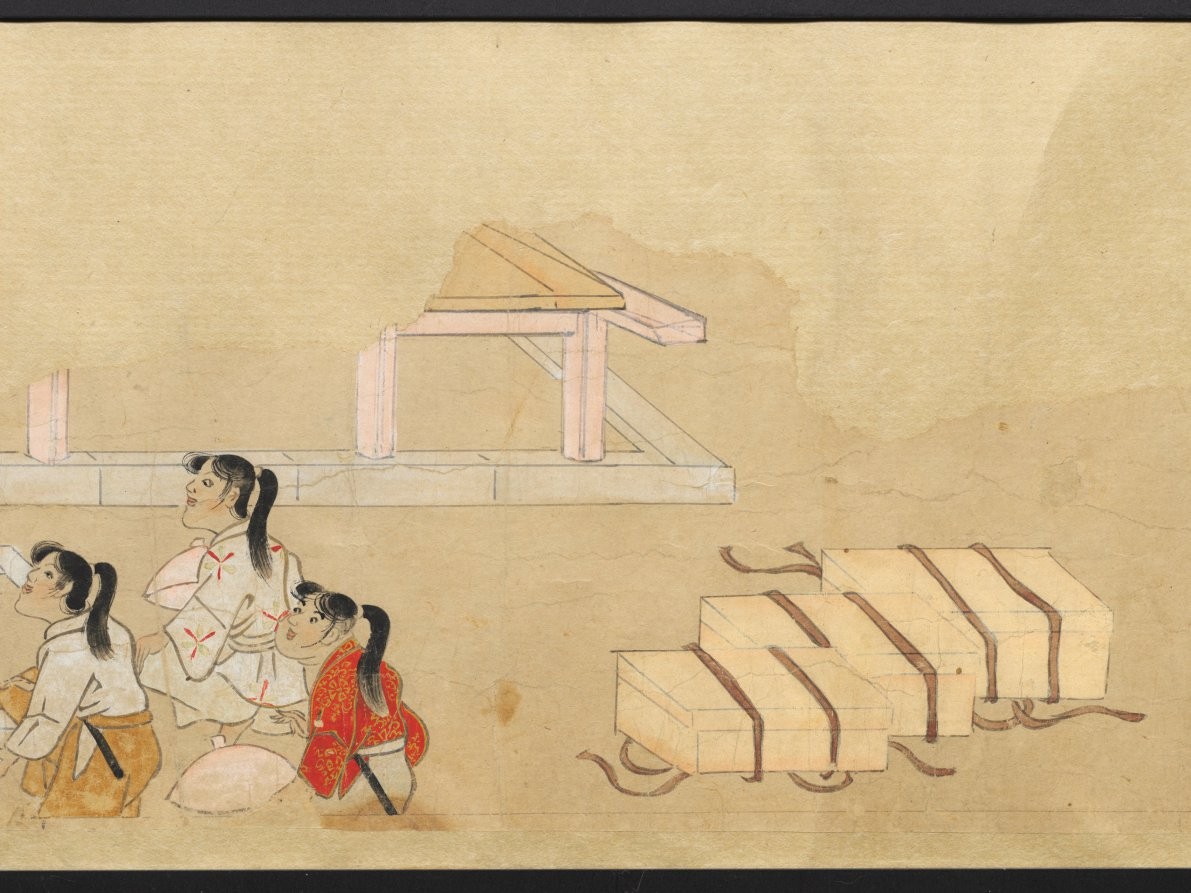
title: The Saltmaker's Story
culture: Japan, Edo period (1615–1868)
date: early 1600s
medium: One of a pair of handscrolls; ink, color, and gold on paper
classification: Painting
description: Once read and copied by girls at New Year’s celebrations and included in dowries, The Saltmaker’s Story is a rags-to-riches tale in which daughters are gifts from the gods. Despite his simple outlook, the main character progresses from humble roots as an associate at Kashima Shrine to the elite status of grandfather of the emperor through the intervention of the Kashima deity. The Saltmaker’s Story is traditionally presented in a set of three scrolls, but the text of this set has been removed by a previous owner, who remounted the illustrations as a pair. The paintings of this one take us from right to left through the second half of the tale.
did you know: This handscroll originally had texts before its paintings, but the texts were removed.